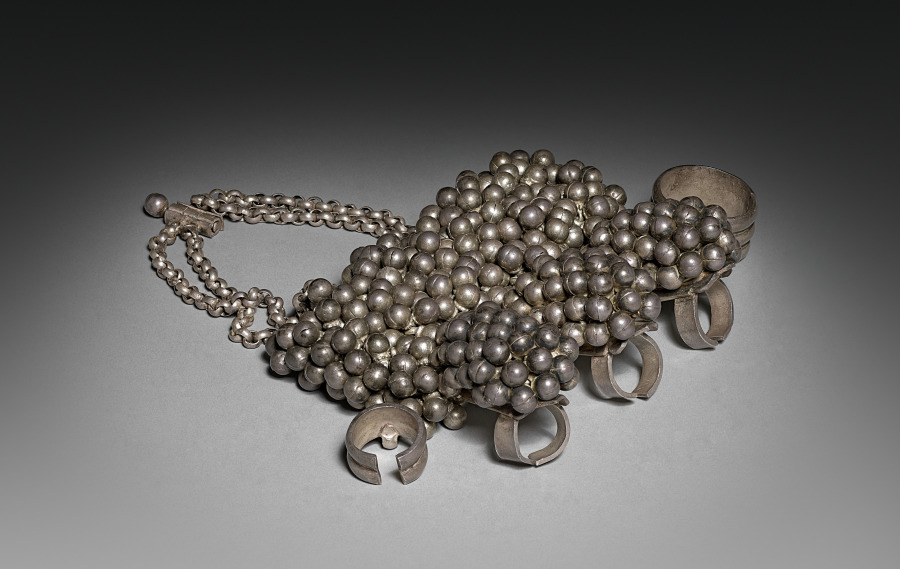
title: Toe Rings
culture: India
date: 1800s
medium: silver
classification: Jewelry